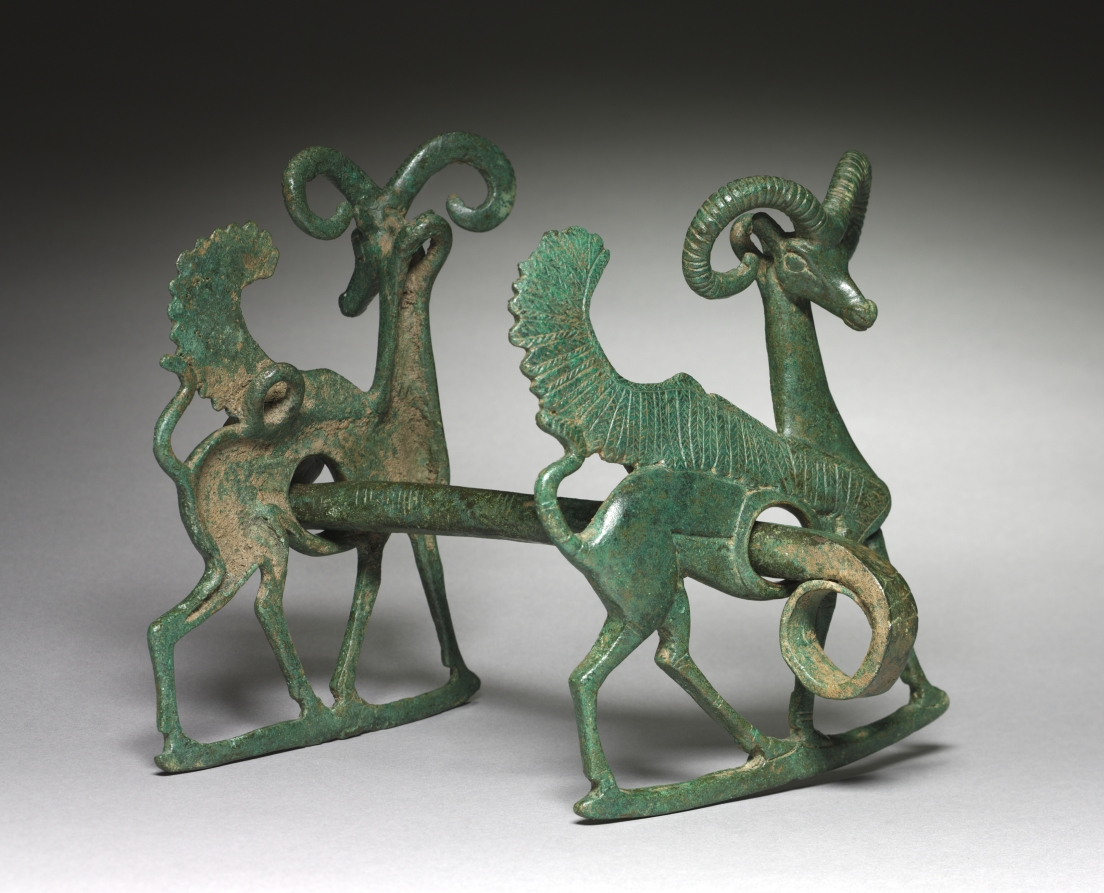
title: Horse Bit with Winged Ibex Cheekpieces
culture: Iran, Luristan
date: 800–600 BCE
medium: bronze, cast and incised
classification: Sculpture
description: This cast bronze horse bit joins two cheekpieces in the form of winged ibexes striding forward with turned heads. Incised lines decorate their curved horns and feathered wings. Rings penetrating their bodies hold the metal bit, while smaller rings on the hollow, unworked inner sides (behind the heads and hindquarters) may have held straps to secure the bit over the horse’s face. This work is said to be from Luristan, a region in western Iran known for its creation of bronze weapons, horse trappings, and standards in the Iron Age.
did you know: Fantastical creatures such as winged ibexes and sphinxes often appear in Luristan bronzes.